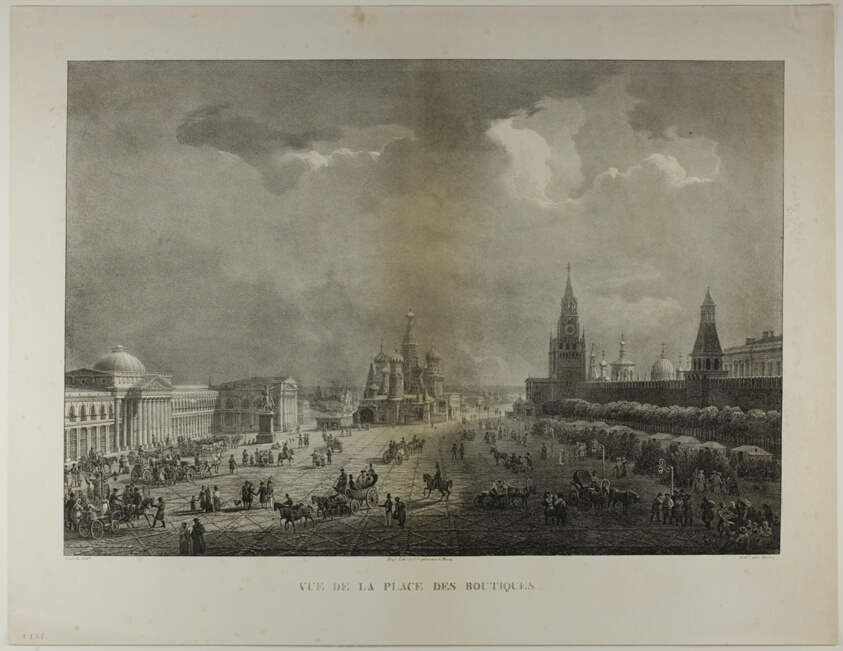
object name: Print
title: View of the Square of the Merchants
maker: Deroy (French, 19th century); after Jean-Baptiste Cadolle (French, 1782-1849); printed by Gottfried Engelmann (French, 1788-1839)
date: 1833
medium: Lithograph in black on ivory wove paper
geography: France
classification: lithograph; print; prints and drawing